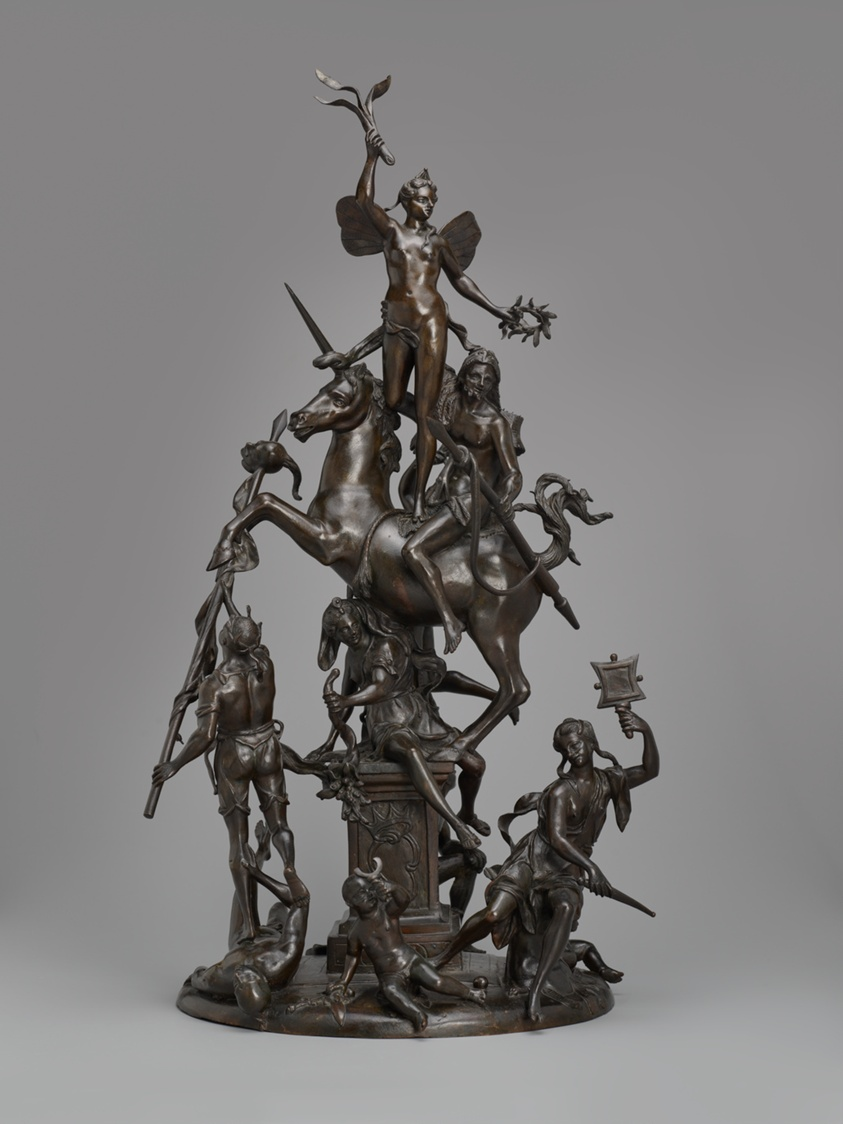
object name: Sculpture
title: Allegorical Group of Victory Supported by Valor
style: 18th Century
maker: Francesco Bertos (Italian, active c. 1693–1739)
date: 1700/10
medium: Bronze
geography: Italy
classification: statuette; Italian; sculpture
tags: victory, woman, weapons, unicorns, sculpture, nudes, mirror, men, laurel wreaths, head, crowns, children, animals